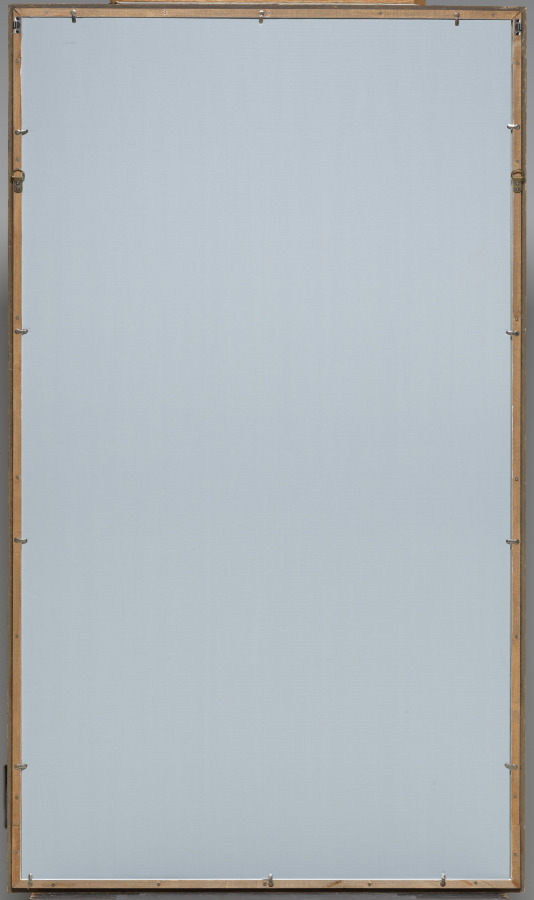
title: Lineage Portrait of Buddhist Monks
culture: China, Qing dynasty (1644–1911)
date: 1600s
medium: hanging scroll mounted on a panel (framed); ink, color, and gold on paper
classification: Painting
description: This painting features 24 Buddhist priests, likely of several generations and members of the same temple or school. The priests are depicted with attention to individual features and appearances, dressed in their formal garments. They may represent monks of the Ōbaku school, a form of Chan (Japanese: Zen) Buddhism founded in Japan by Chinese émigré monks and their Japanese followers.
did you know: The painting has remnants of a Japanese mounting, indicating that it was once kept in Japan.